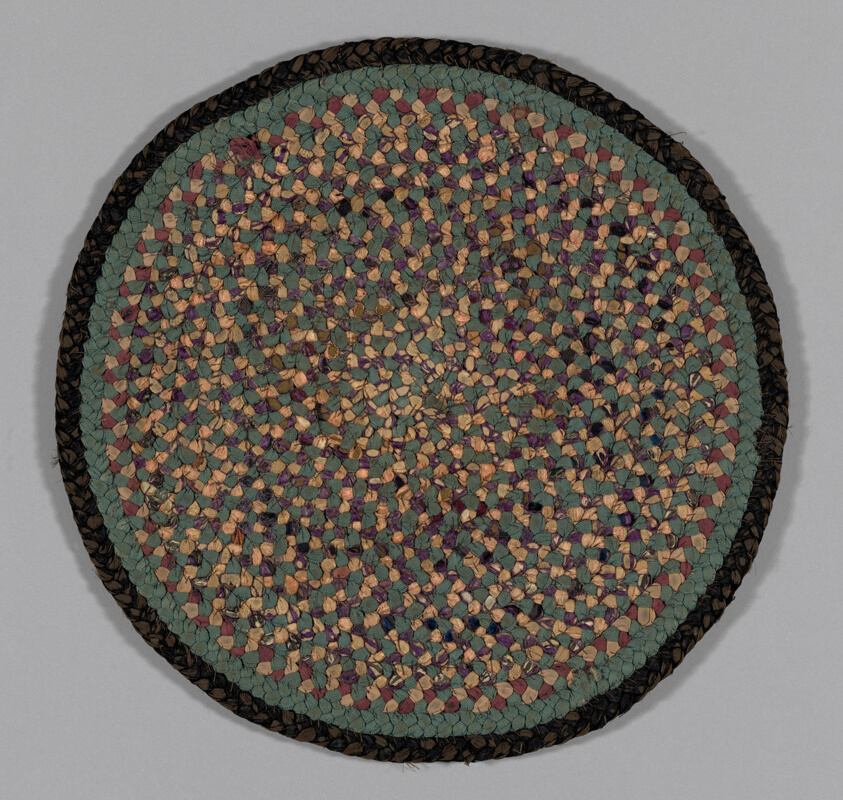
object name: Textile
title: Braided Rug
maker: United States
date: late 19th century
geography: United States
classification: textile; needlework (visual works)